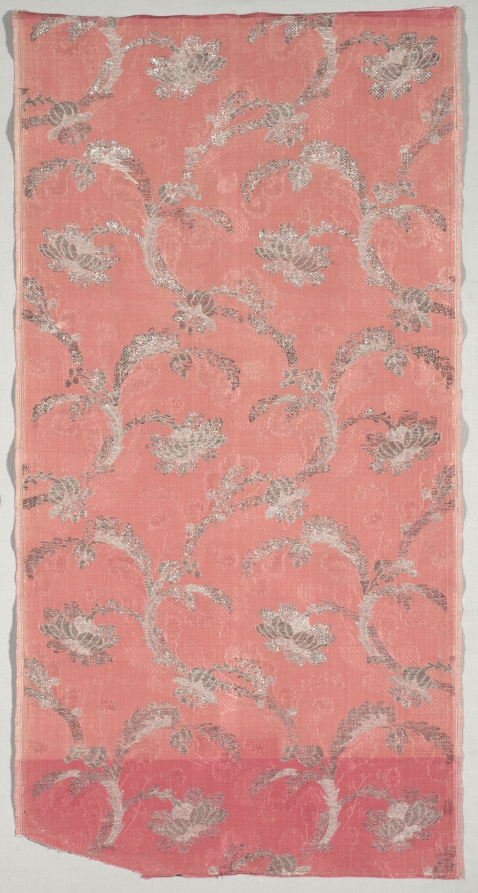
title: Length of Textile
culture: France, 18th century, Period of Louis XV (1723-1774)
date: 1723–1774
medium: brocade; silk and metal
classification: Textile